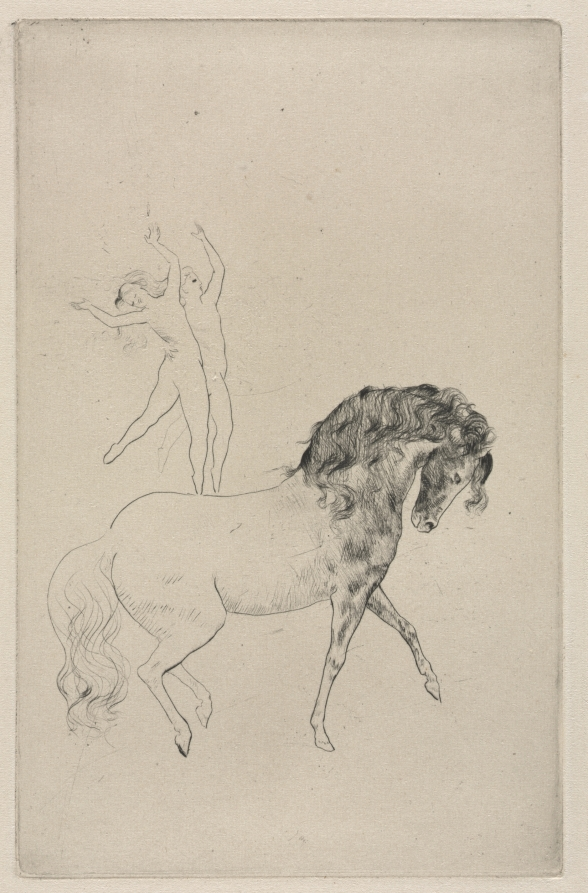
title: At the Circus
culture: Spain, 20th century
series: The Saltimbanques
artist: Pablo Picasso (Spanish, 1881–1973)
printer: Louis Fort (French, active 1800s–1900s)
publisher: Ambroise Vollard (French, 1867–1939)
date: winter 1905–6, printed 1913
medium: drypoint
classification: Print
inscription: Watermark: [VAN GELD]ER ZONEN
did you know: Picasso frequently attended the Cirque Medrano in the Montmartre neighborhood of Paris where he lived at the time.